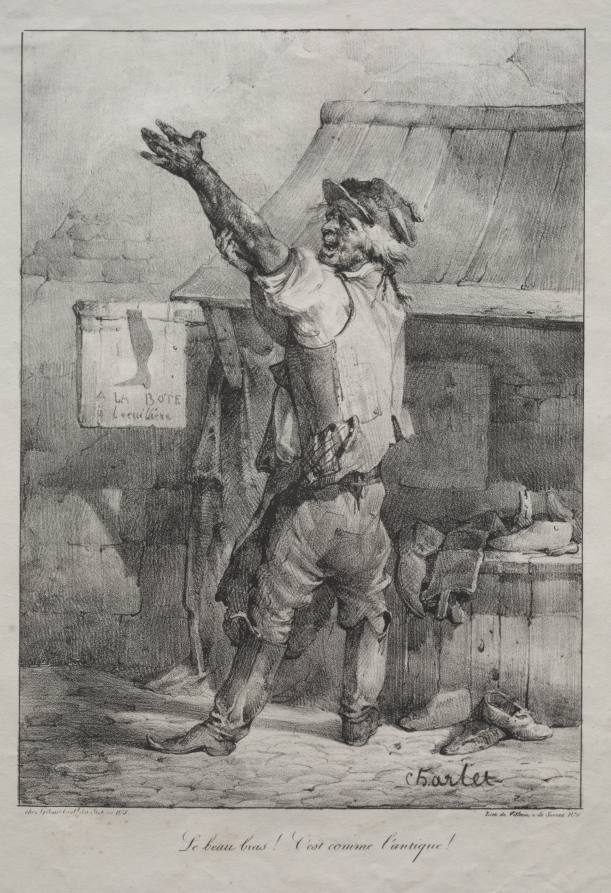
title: Le beau bras: C'est comme l'antique!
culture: France, 19th century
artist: Nicolas Toussaint Charlet (French, 1792–1845)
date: c. 1822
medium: lithograph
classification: Print